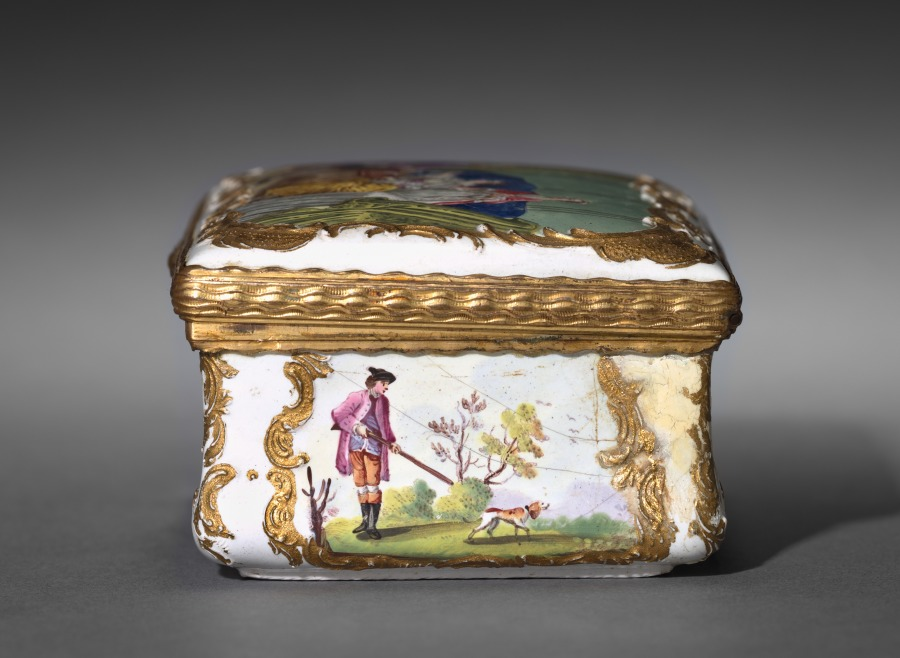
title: Box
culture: England, 18th century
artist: South Staffordshire Factory (British)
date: 1760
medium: enamel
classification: Enamel